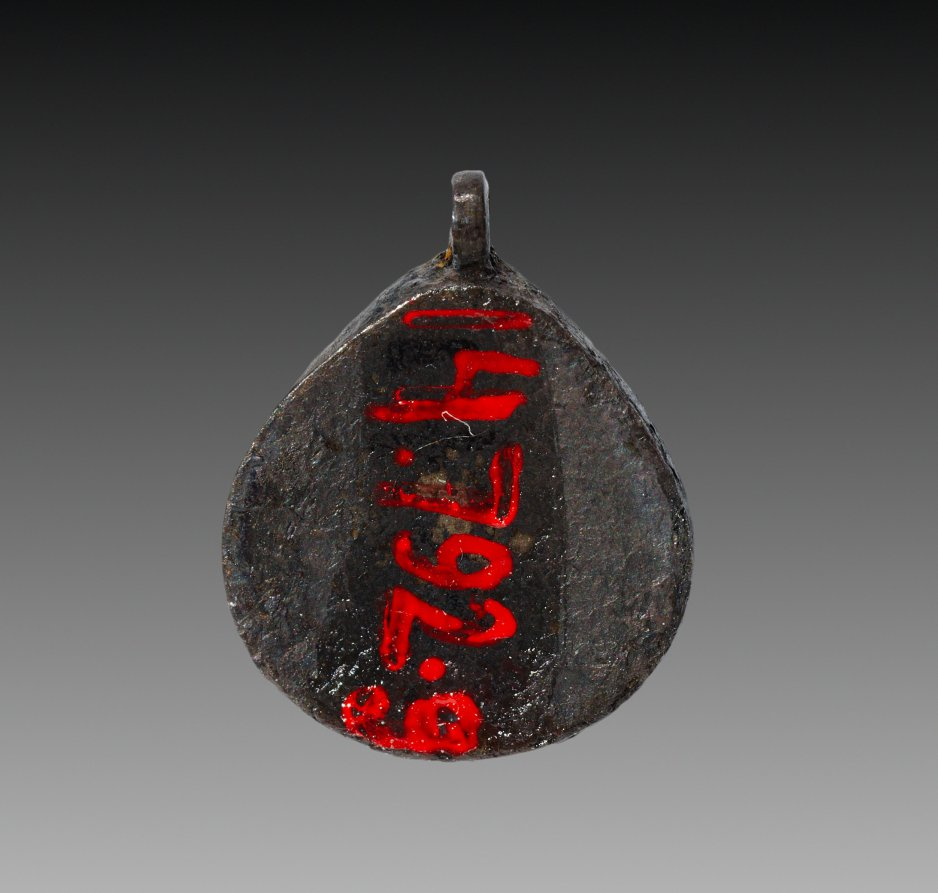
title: Oyster-Shell Pendant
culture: Egypt, Middle Kingdom (2040–1648 BCE), Dynasty 12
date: 1980–1801 BCE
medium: carnelian and silver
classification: Jewelry